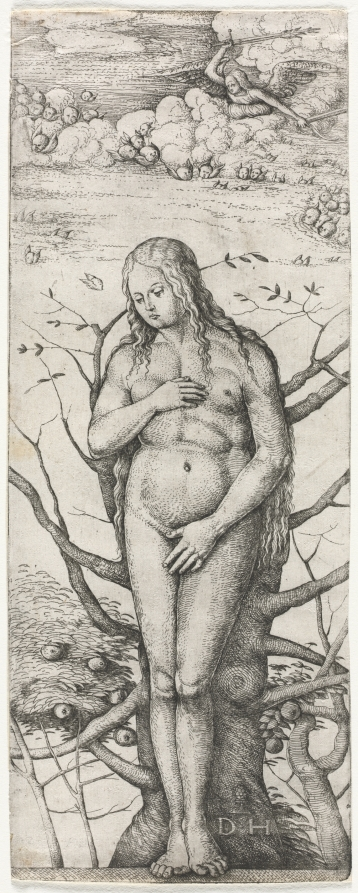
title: Eve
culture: Germany, late 15th-early 16th century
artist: Daniel Hopfer (German, c. 1470–1536)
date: 1505–36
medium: etching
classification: Print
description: Sometimes the scarcity of nature is just as significant as its abundance. Here, a tree that appears to be dying forms the backdrop for Eve, who covers herself in a pose associated with modesty in Classical sculpture. Her arms convey the shame of sin, a state of despair emphasized by her downward gaze. The dying tree also suggests paradise lost, the inevitability of death. Daniel Hopfer was one of the first artists to use the etching technique, printing his works from iron plates, rather than copper, as became common later.